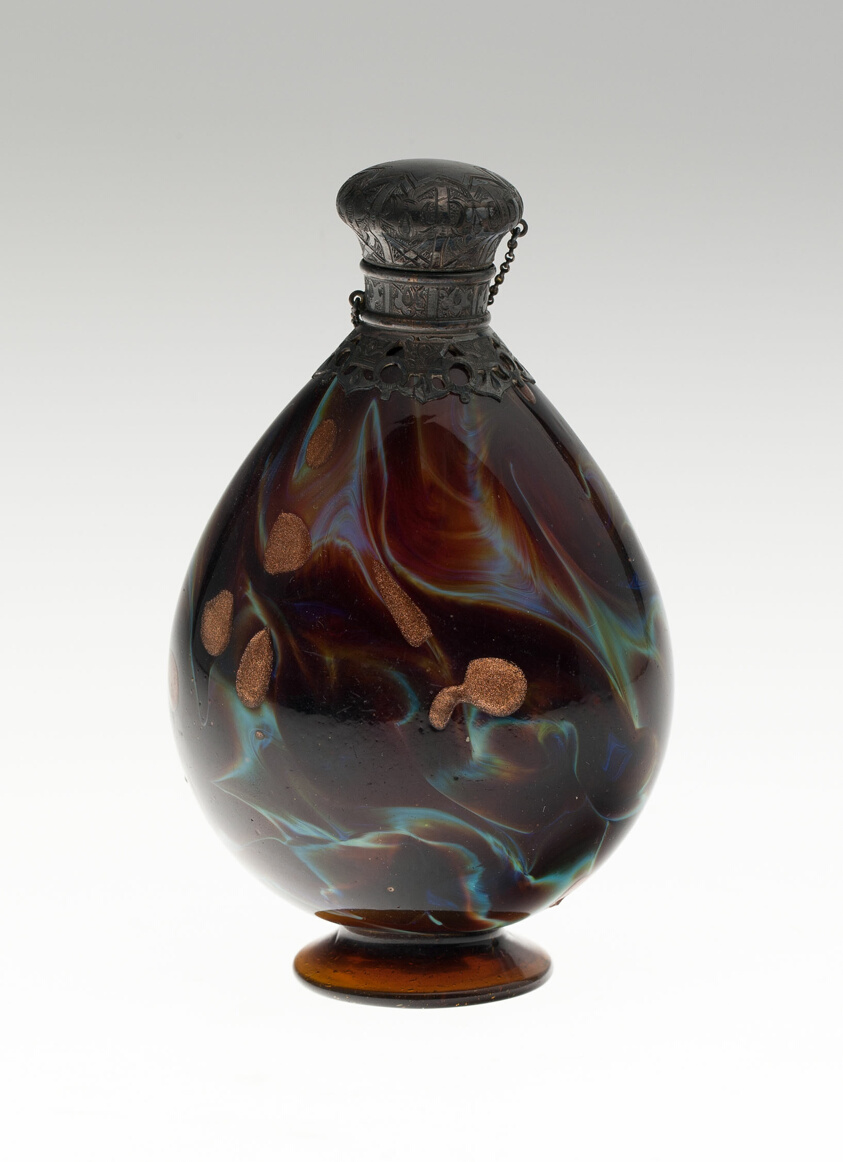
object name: Glass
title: Scent Bottle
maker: Probably Italy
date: 19th century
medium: Marbled glass with metal mounts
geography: Italy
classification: glass; european decorative arts